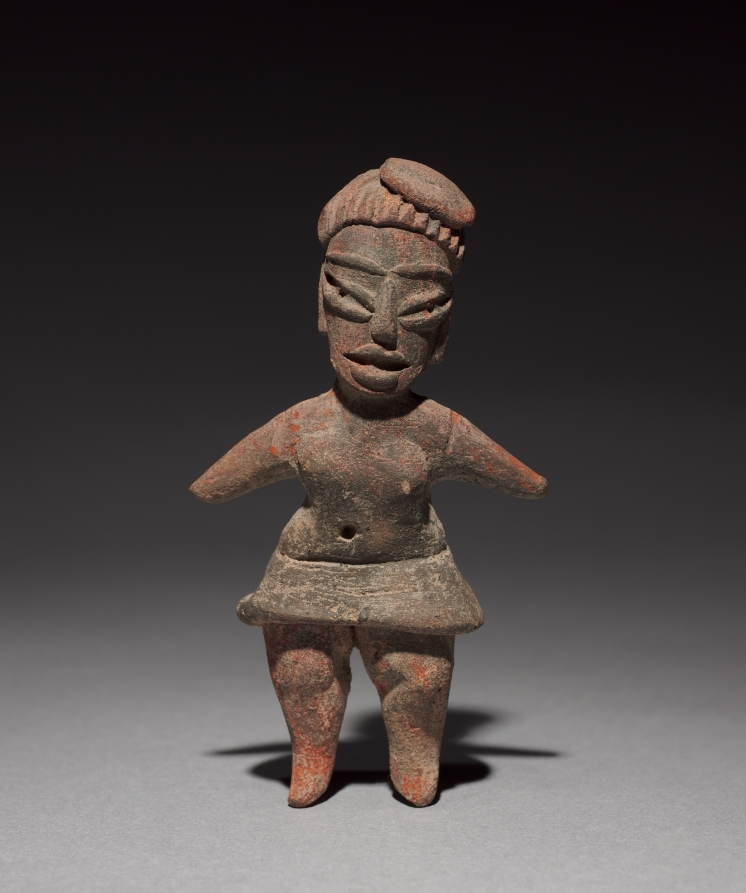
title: Archaic Figurine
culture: Mesoamerica, Central Mexico, Tlatilco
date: c. 1200–900 BCE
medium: earthenware with pigment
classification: Ceramic